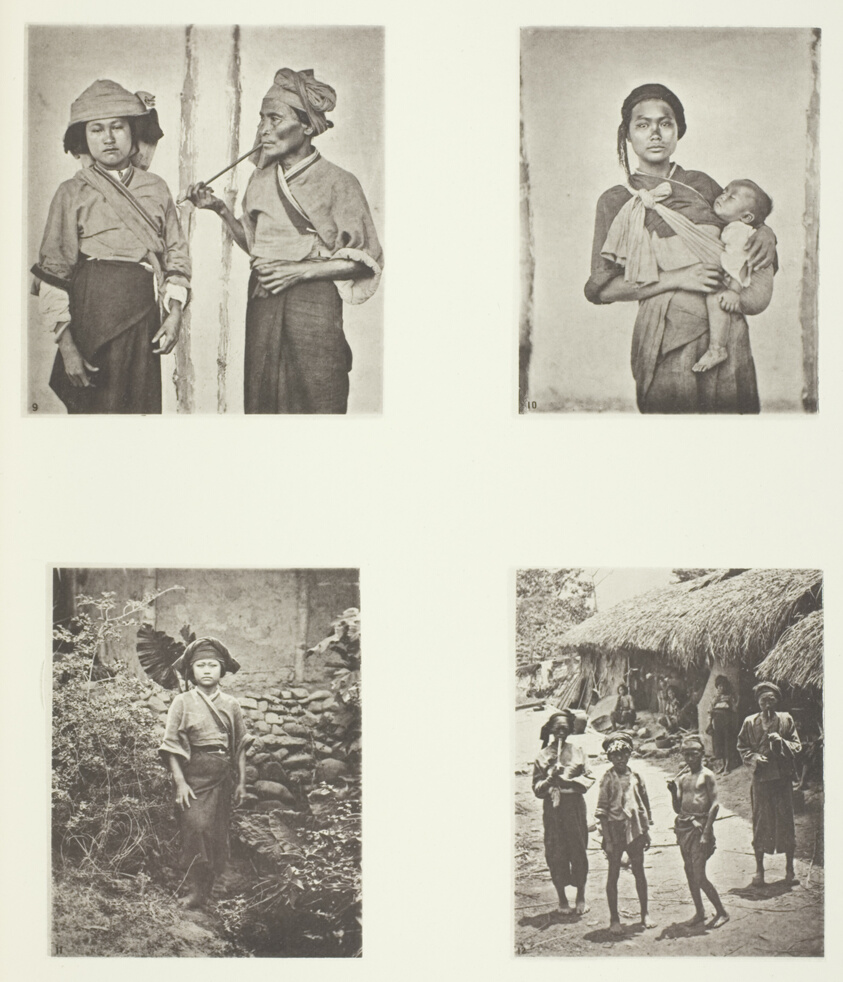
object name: Photograph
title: Pepohoan Women; Mode of Carrying Child; Costume of Baksa Women; Lakoli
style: 19th century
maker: John Thomson (Scottish, 1837–1921)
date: c. 1868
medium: Collotype, pl. IV from the album "Illustrations of China and its People, Volume II" (1873)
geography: Scotland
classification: photography; photograph